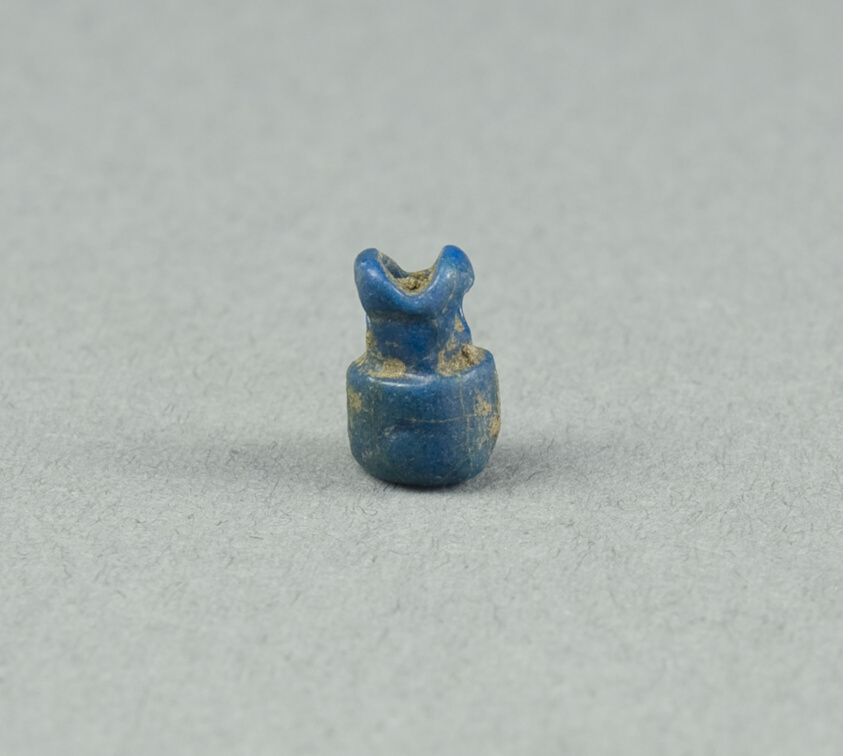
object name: Costume and Accessories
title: Amulet of a Situla (Jar)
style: egyptian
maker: Egyptian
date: Third Intermediate Period, Dynasties 21–25 (about 1069–656 BCE)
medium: Faience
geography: Egypt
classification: amulet; jewelry; ceramics; ancient art; costume; faïence (composite material)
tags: jar